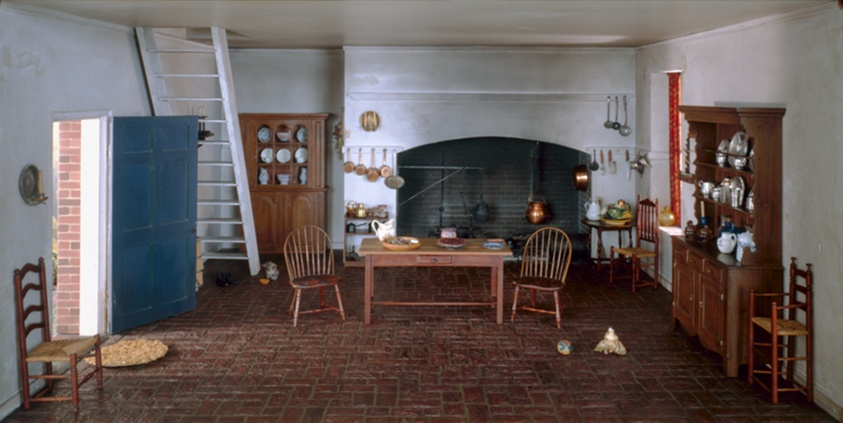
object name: Miniature room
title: A27: Virginia Kitchen, 18th Century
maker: Designed by Narcissa Niblack Thorne; American, 1882-1966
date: c. 1940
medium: Miniature room, mixed media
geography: United States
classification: miniature; thorne rooms